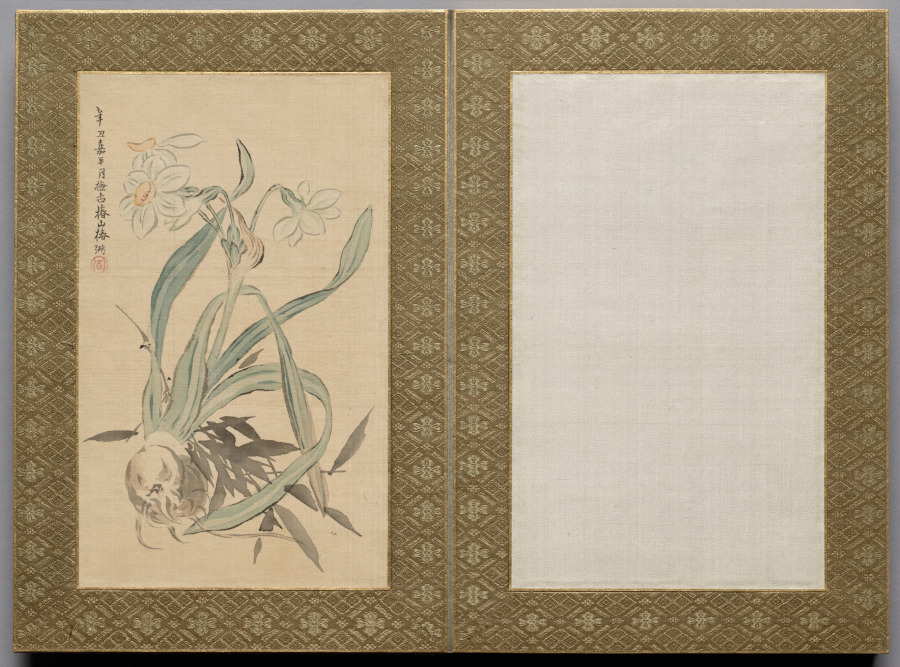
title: Painting from Flowers and Grasses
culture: Japan, Edo period (1615–1868)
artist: Tsubaki Chinzan (Japanese, 1801–1854)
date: 1841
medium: album; ink and color on silk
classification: Painting